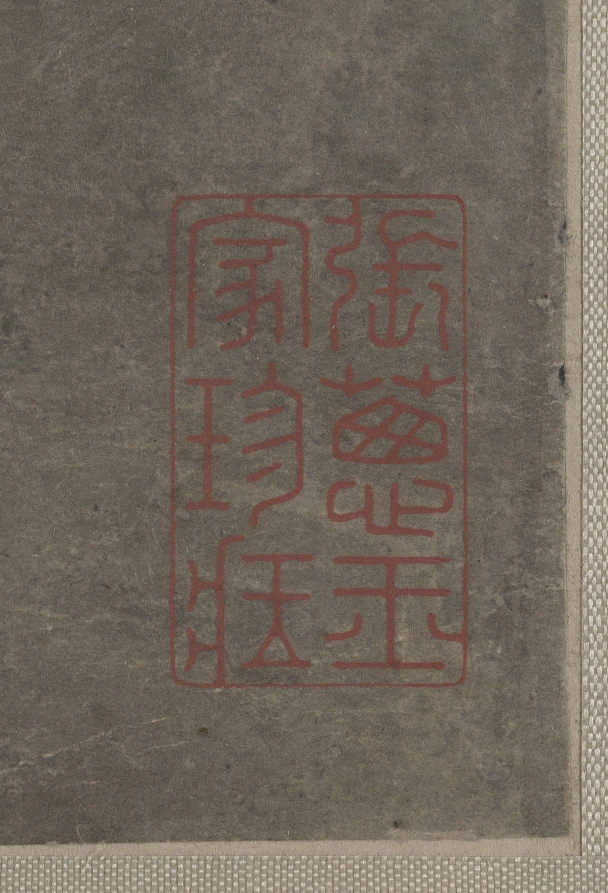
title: The Poet Lin Bu Wandering in the Moonlight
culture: China, Ming dynasty (1368–1644)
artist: Du Jin (Chinese, 1446-c. 1519)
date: late 1400s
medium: Hanging scroll; ink and color on paper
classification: Painting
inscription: 陪月閒行杖屨遲，半醒時節更相宜。 吟成疏影寒香句，為問梅花知不知。 檉居杜堇 [印]一書生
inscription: 1 seal of Zhang Heng 張珩 (1915–1963)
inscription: 1 seal of C. C. Wang [Wang Jiqian] 王季遷 (1907–2003)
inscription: 1 unidentified seal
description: Lin Bu (967–1028), a Northern Song (960–1127) poet and hermit who lived at the West Lake in Hangzhou, was known for having plum trees for his female companions and cranes for his children. This hanging scroll depicts the poet walking in the moonlight and looking at the plum tree, a scene described in his most well-known poem on plum blossoms. Surviving works signed by Du Jin are rare and this painting is one of them. Here, the artist used lively brushwork to depict the plum tree and rocks, exemplified in varying dots and strokes, and sweeps in different shades of ink.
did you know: Lin Bu withdrew from prestigious government service and lived as a hermit by the West Lake in Hangzhou.